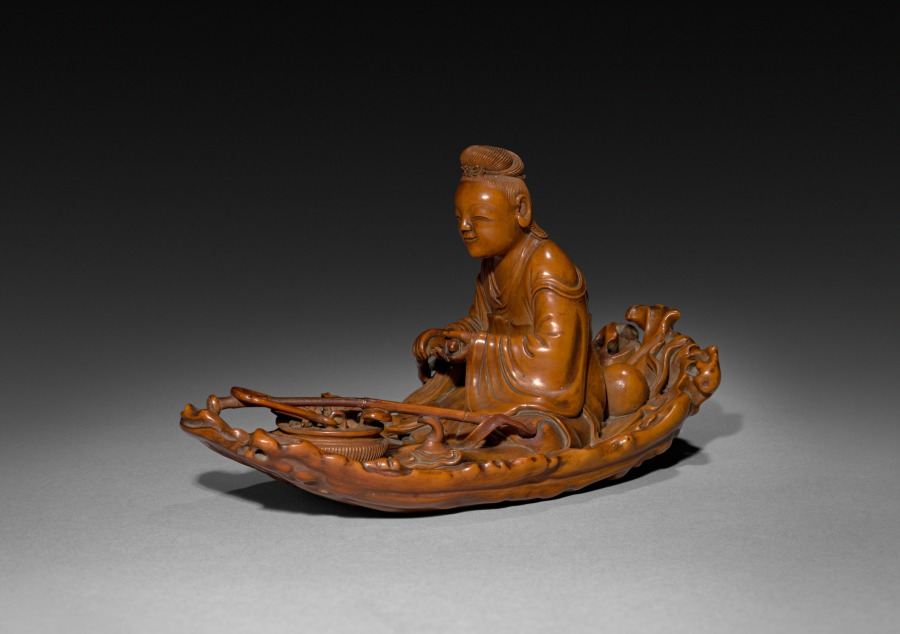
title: Figure of Daoist Immortal He Xiangu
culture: China, Qing dynasty (1644-1911)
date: 1700s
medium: Boxwood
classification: Wood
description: He Xiangu is one of the Eight Immortals in the Daoist pantheon. She was thought to have been a real person who lived in the Tang dynasty, originally named He Qiong. As a teenager, she was instructed in a dream to eat powdered mica to become immune from death and to vow to remain unmarried. She did so and became an enlightened practitioner of Daoism. In this delicate carving, He Xiangu is placidly seated in a gnarled and knotty wooden raft amid green-tinted ivory waves. In front of her rests a bamboo basket filled with objects associated with Daoist immortality, and she holds a branch of lingzhi fungus like an oar.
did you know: The lingzhi she holds is a woody mushroom often used in traditional Chinese medicine and associated with immortality.